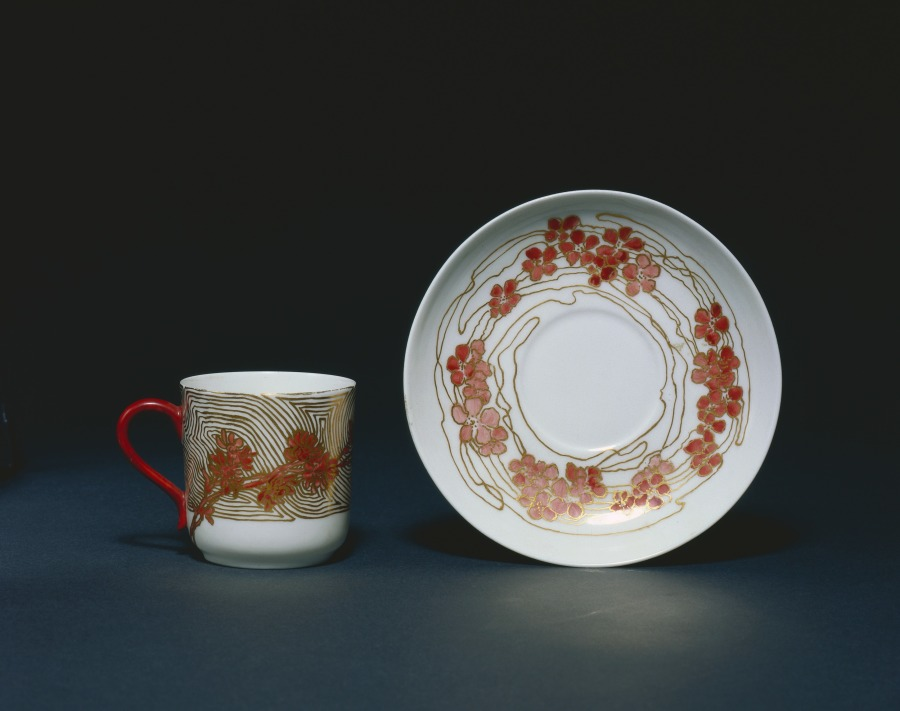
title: Cup and Saucer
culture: America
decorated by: M. Louise McLaughlin (American, 1847–1939)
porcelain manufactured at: Haviland & Co. (French)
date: 1888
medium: porcelain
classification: Ceramic